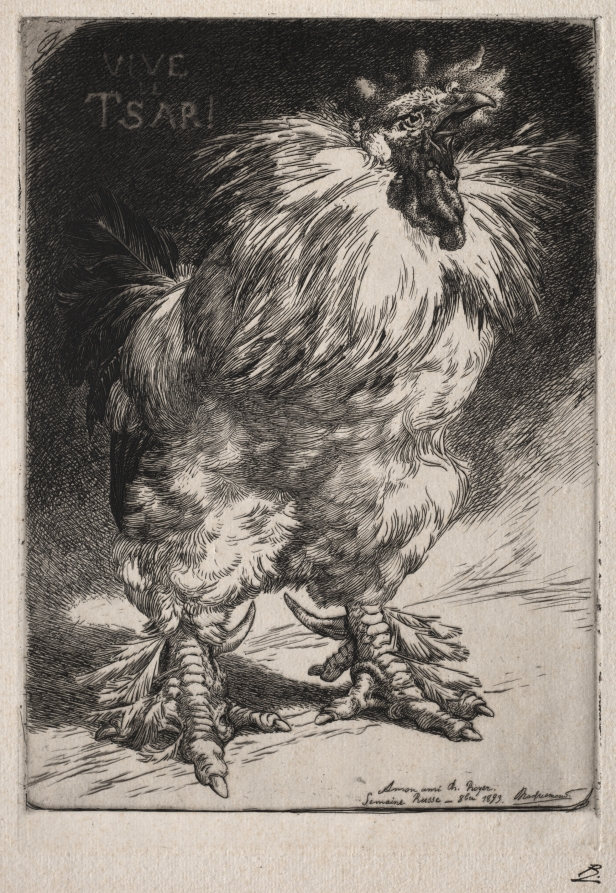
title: The French Cock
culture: France, 19th century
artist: Félix Bracquemond (French, 1833–1914)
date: 1893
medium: etching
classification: Print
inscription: printed in the plate, lower right: À mon ami Ch. Royer, Semaine russe --8 bre 1893. Braquemond